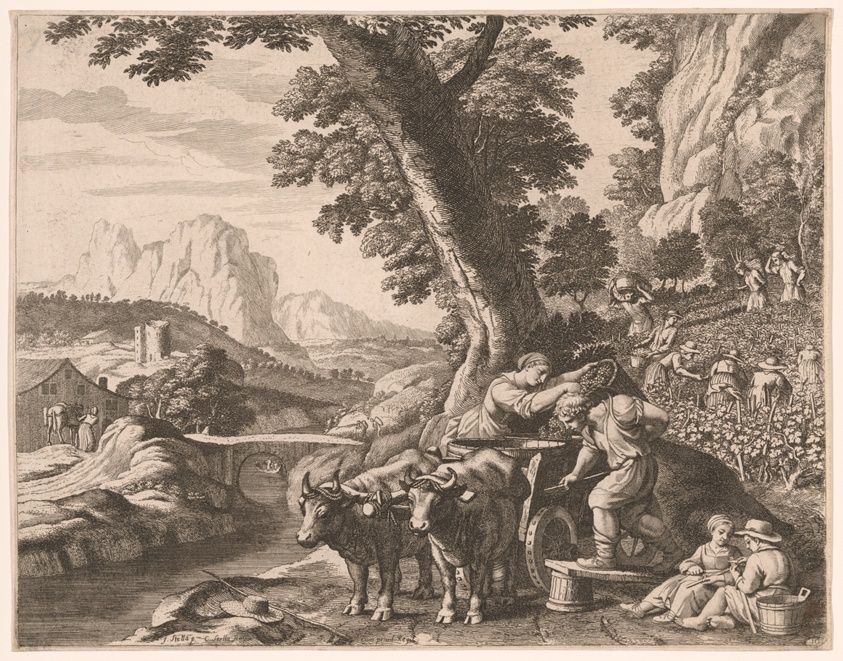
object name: Print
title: The Harvest, Plate 10 from Pastorales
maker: Claudine Bouzonnet-Stella (French, 1636–1697); after Jacques Stella (French, 1596-1657)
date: 1667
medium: Etching in black on cream laid paper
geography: France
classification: prints and drawing; paper; etching; print